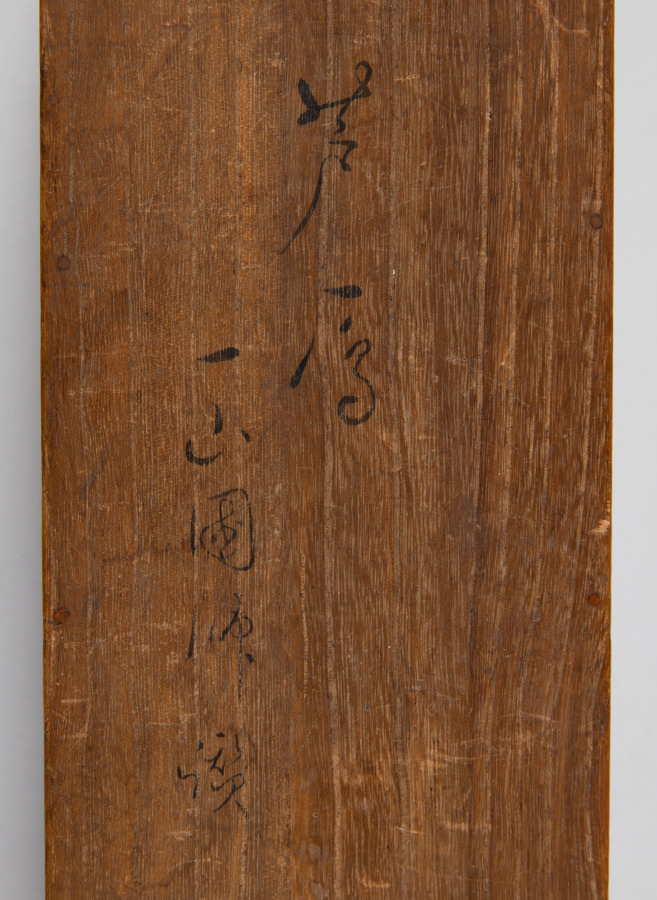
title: Reeds and Geese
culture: Japan, Kamakura period (1185–1333)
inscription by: Yishan Yining [Issan Ichinei] (Chinese, 1247–1317)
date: 1314–17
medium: hanging scroll; ink on paper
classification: Painting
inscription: signed: Issan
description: Reeds and geese has been a common pairing in Chinese literary and visual culture for many centuries. This painting presents the contribution of a Japanese amateur painter, almost certainly a Zen Buddhist monk, to Japan’s fledgling efforts to add the theme to its own cultural vocabulary in the early 1300s. As was customary at the time in Japan, the painter did not sign or seal his work; the inscription, a poem added to the painting by the eminent émigré monk Yishan Yining, along with his signature and seal, was of far greater cultural value. Today, the modestly sized painting has tremendous significance as one of the earliest surviving examples of Japanese ink paintings with reeds and geese.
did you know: Tokyo National Museum owns a copy of this painting made by Kano Gyokusen (1796–1864) when he was 14 years old.